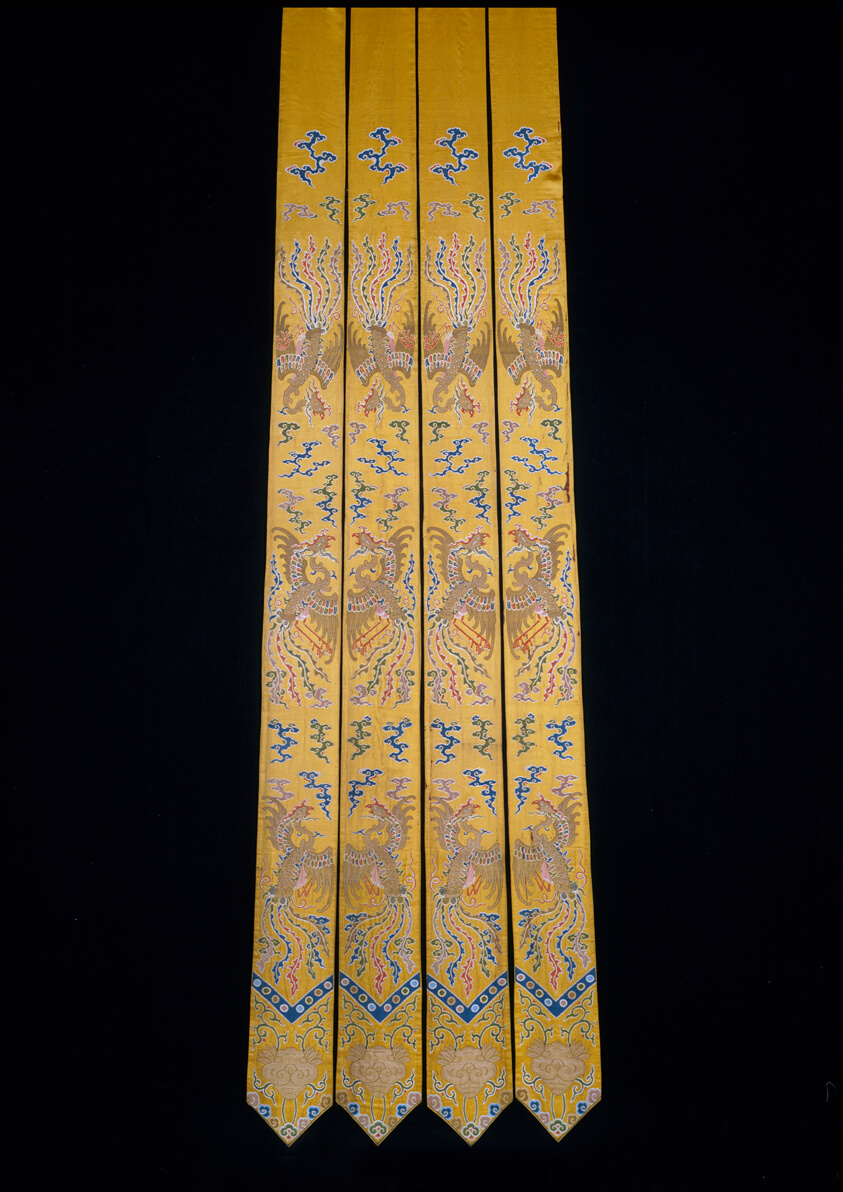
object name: Textile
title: Pendents (For Bed Curtains)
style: qing, Chinese (culture or style), East Asian, asian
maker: Manchu (China)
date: Qing dynasty (1644–1911), 1736/95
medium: Silk, gold-leaf-over-lacquered-paper strips, and gold-leaf-over-lacquered-paper-strip-wrapped silk, warp-float faced 7:1 satin weave with supplementary brocading wefts bound in weft-float faced 1:3 'S' twill interlacings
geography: China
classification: textile; weaving